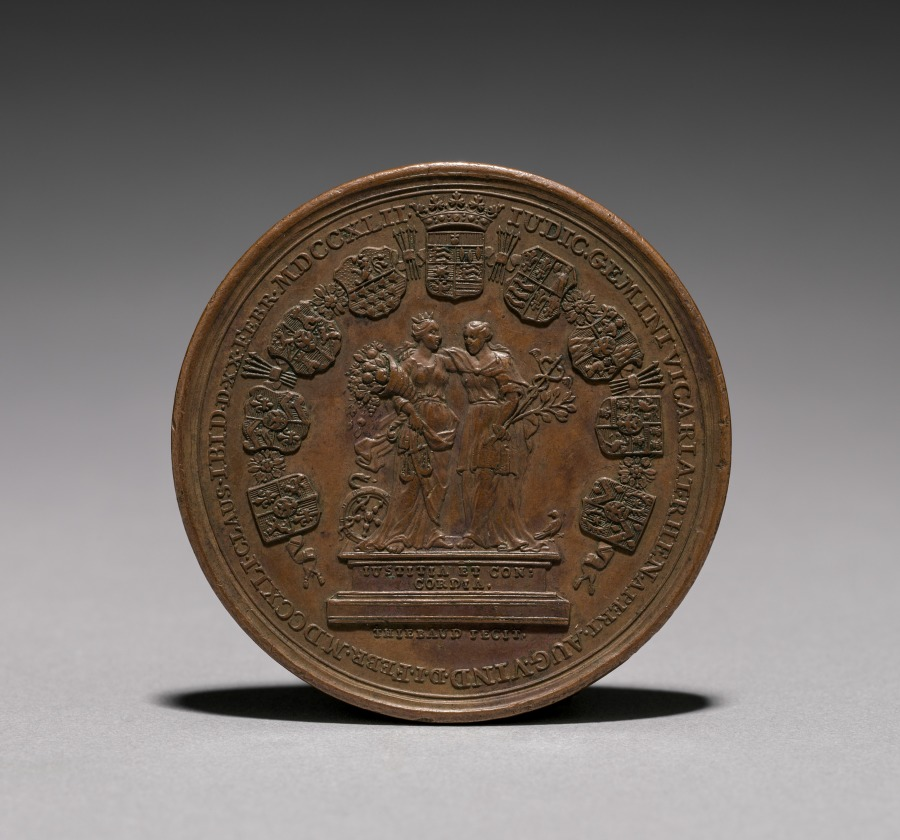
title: Augsburg Medal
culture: France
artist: Thiebaud (French)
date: 1742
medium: bronze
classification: Metalwork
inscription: Carol Alb. et Carol Phil. S.R.L. in Part. Rhen. Suev. et Franc. iur. Prov. et. con. Vic. Utrumq. unum.